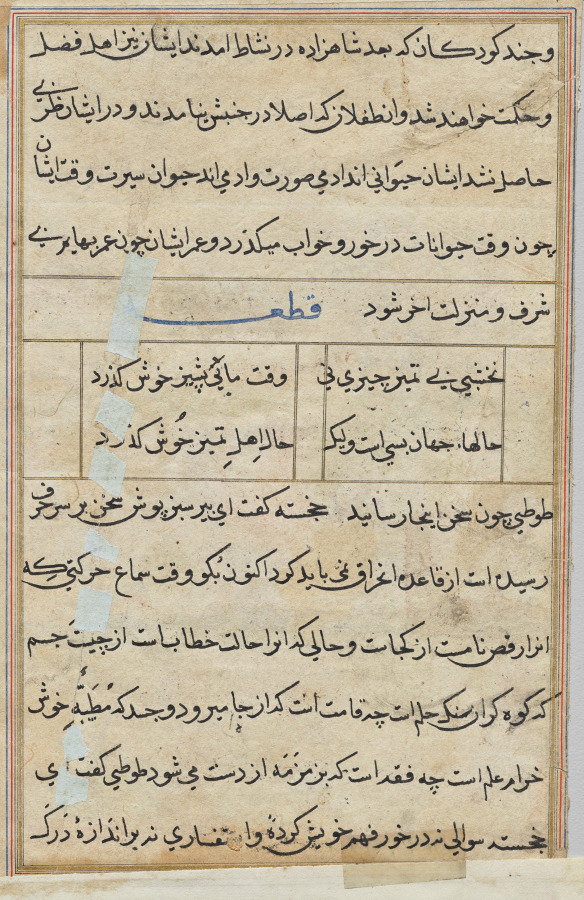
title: Tuti-Nama (Tales of a Parrot): Tale XIII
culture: Mughal India, court of Akbar (reigned 1556–1605)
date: c. 1560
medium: gum tempera, ink, and gold on paper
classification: Painting